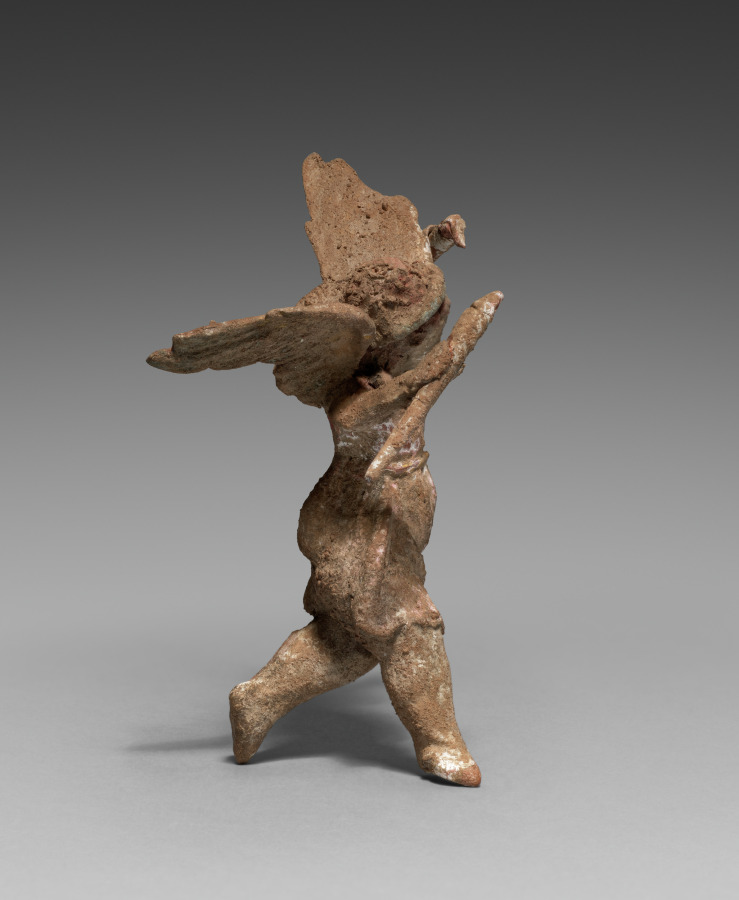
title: Figurine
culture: Greece, Myrina, Hellenistic Period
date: 300–100 BCE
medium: terracotta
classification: Sculpture